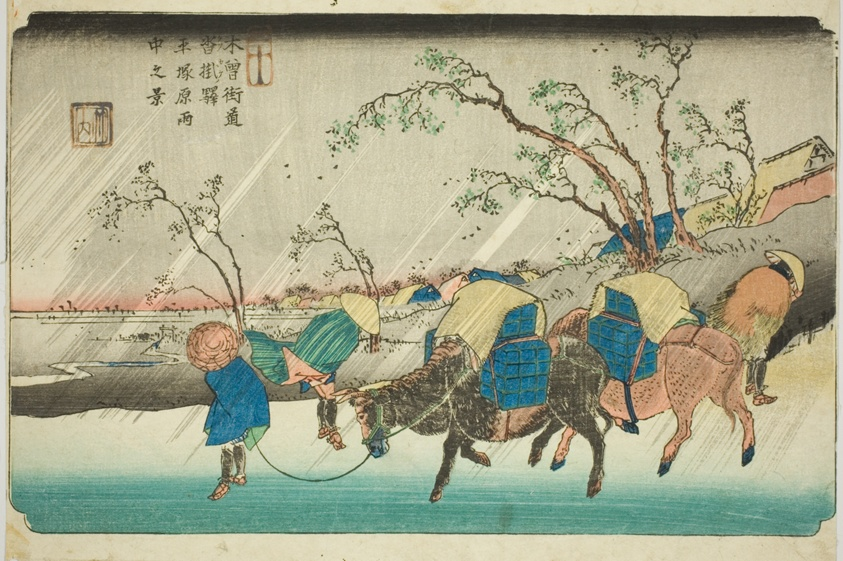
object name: Print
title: No. 20: Rain on the Hiratsuka Plain near Kutsukake Station (Niju: Kutsukake no eki, Hiratsukahara uchu no kei), from the series "[Sixty-nine Stations of the] Kisokaido (Kisokaido [rokujukyu tsugi no uchi])"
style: Japanese (culture or style)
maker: Keisai Eisen (Japanese, 1790-1848)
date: c. 1835/36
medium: Color woodblock print; oban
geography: Japan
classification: woodblock print; print; asian art